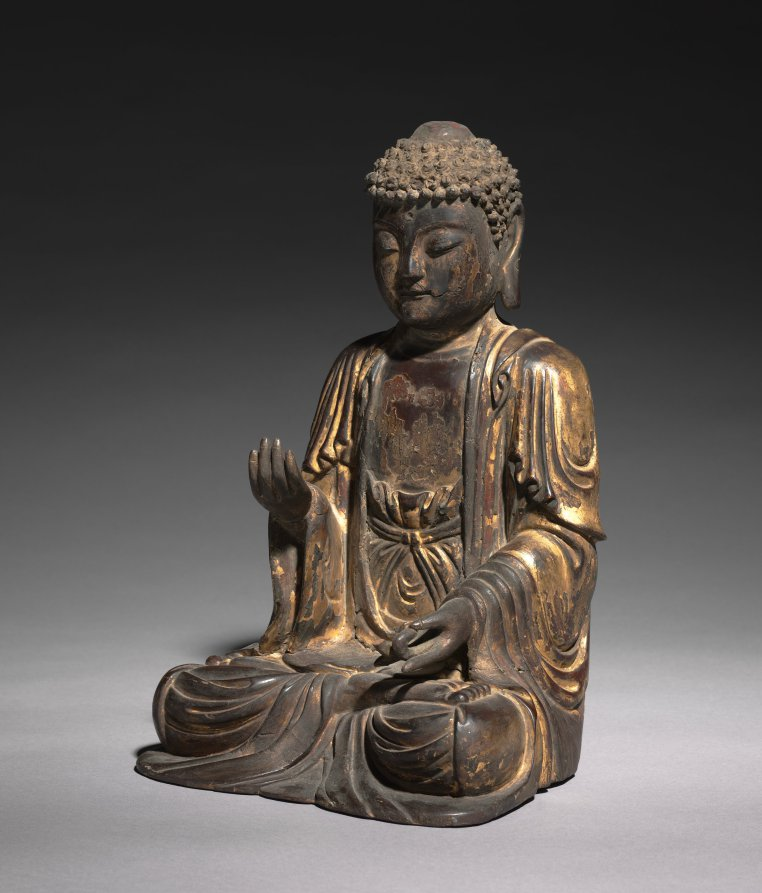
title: Seated Amitabha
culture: Korea, Goryeo dynasty (918–1392)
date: 1300s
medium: wood with lacquer and gilding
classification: Sculpture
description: In Buddhist art, buddhas (supreme beings who entered the world of nirvana) and bodhisattvas (compassionate beings committed to the attainment of enlightenment for others) are two main subjects. The religious role of buddhas and bodhisattvas—to lead all sentient beings to the realm of Buddhahood—is the same, yet visual languages to represent them is different. As shown in this statue, the Buddha is represented as a monk with shaven head and dressed in simple monastic robes. Bodhisattvas, on the other hand, are adorned with elaborate jewelry and a lock of long hair.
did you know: This Buddhist statue was donated to the museum in memory of Godfrey St. G. M. Gompertz (1904-1992), a pioneering scholar and collector of Korean art, in particular in the area of Goryeo-period celadons.